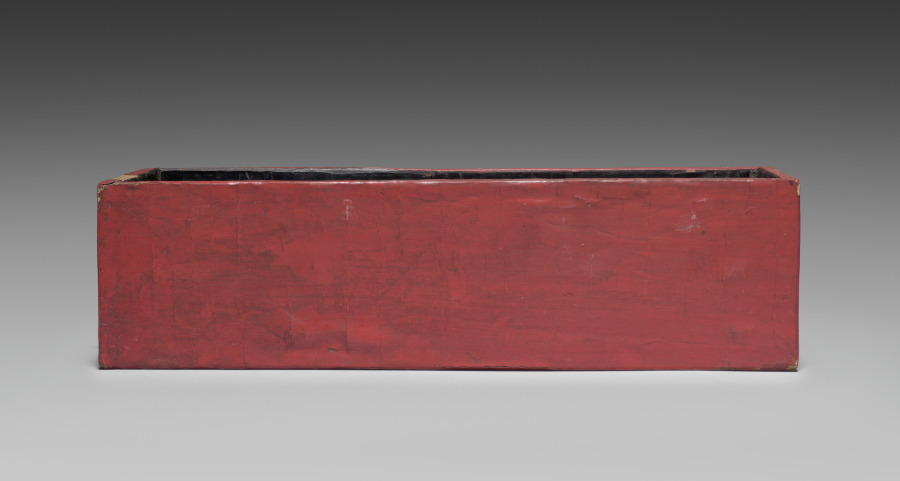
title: Drawer for a Tihong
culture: China, Ming dynasty (1368-1644), Wanli reign (1572-1620)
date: 1585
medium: carved cinnabar lacquer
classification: Lacquer